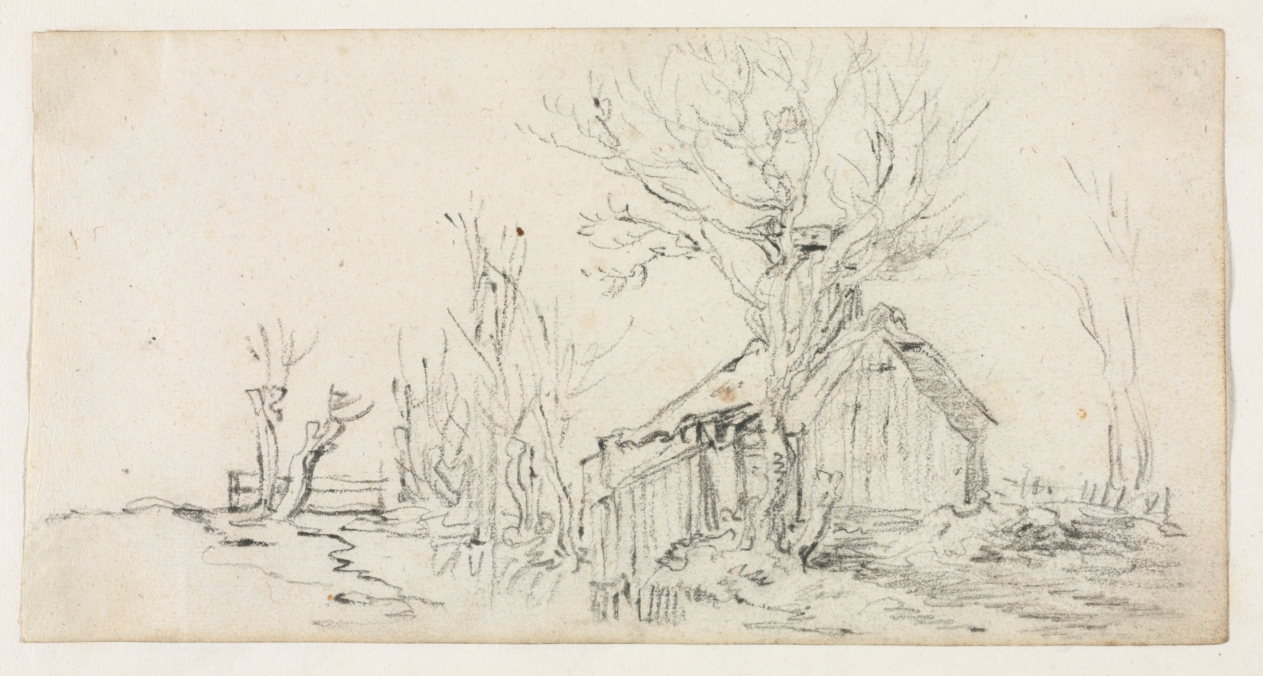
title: Sketch of Landscape with Cottage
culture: Netherlands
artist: Jan van Goyen (Dutch, 1596–1656)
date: c. 1630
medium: black chalk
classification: Drawing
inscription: SECONDARY SUPPORT, upper left, in graphite: e [circled] ; upper right, in graphite: $1,750 / p [circled] / 8713/J ; lower left, in graphite: [illegible, cropped] ; lower right, in graphite: res L [L is circled] / 36 [circled] ; VERSO SECONDARY SUPPORT, lower left, in graphite: H298 ; lower right, in graphite: H